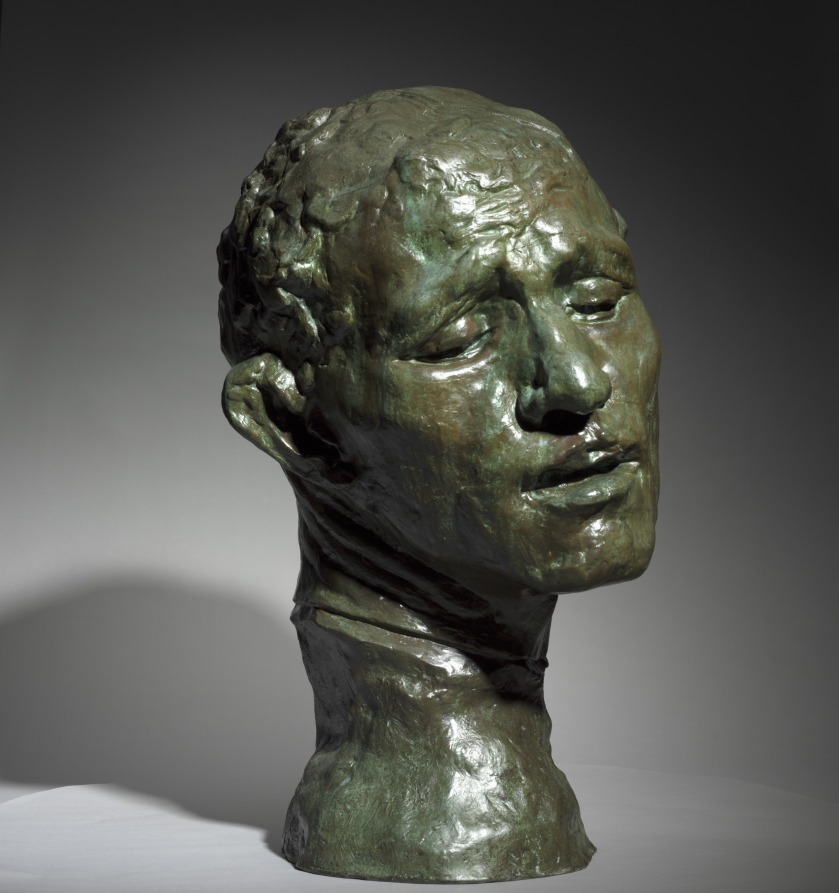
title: Heroic Head of Pierre de Wissant, One of the Burghers of Calais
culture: France, 19th century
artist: Auguste Rodin (French, 1840–1917)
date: 1886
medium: bronze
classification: Sculpture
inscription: inscribed at neck, left: A.Rodin; inscribed lower back: Alexis Rudier/Fondeur-Paris.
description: This sculpture depicts one of the figures in Rodin’s large public monument The Burghers of Calais (1884–89), featuring six French men who volunteered to be taken prisoner by the English in exchange for lifting the siege of Calais during the Hundred Years War (1337–1453). Pierre de Wissant’s anguished expression suggests extreme mental suffering as he contemplates his expected execution. Rodin exhibited a life-size version of the figure as an independent work before completing the monument. He later made multiple versions in various sizes and media.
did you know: This sculpture depicts the head of a figure from Rodin's large public monument The Burghers of Calais (1884-89). The CMA also owns a plaster version of the head.